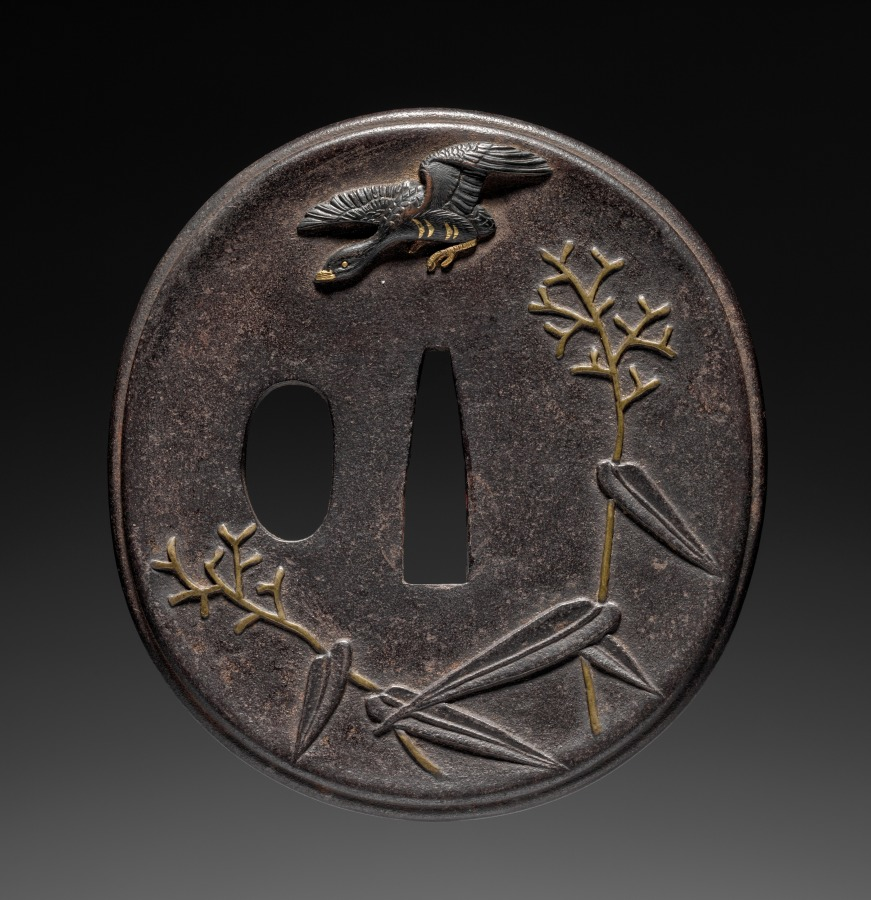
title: Sword Guard (Tsuba) Goose in Reeds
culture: Japan, possibly Edo period (1615-1868)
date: c. 1615–1868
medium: iron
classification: Arms and Armor